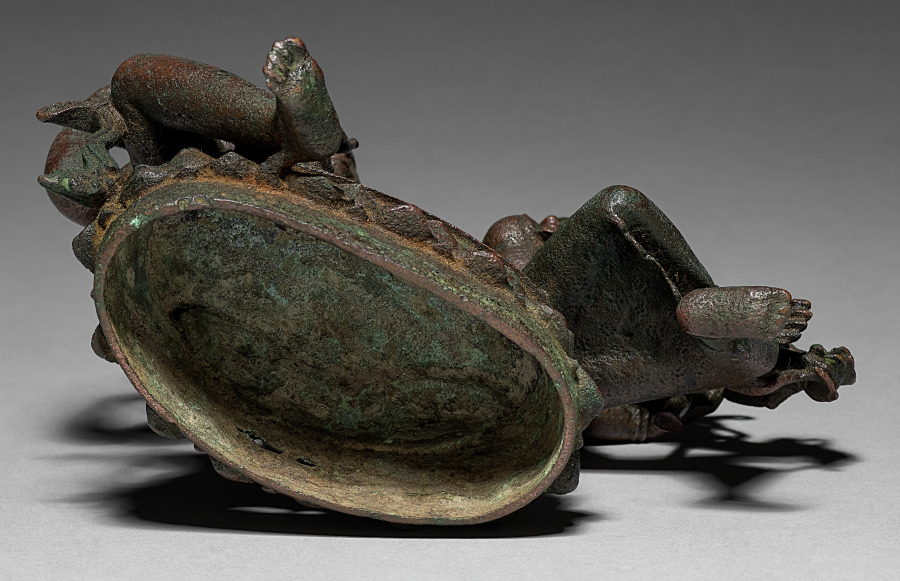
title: Shiva and Parvati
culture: East India, Bengal, Pala period, 9th Century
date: 800s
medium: bronze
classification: Sculpture